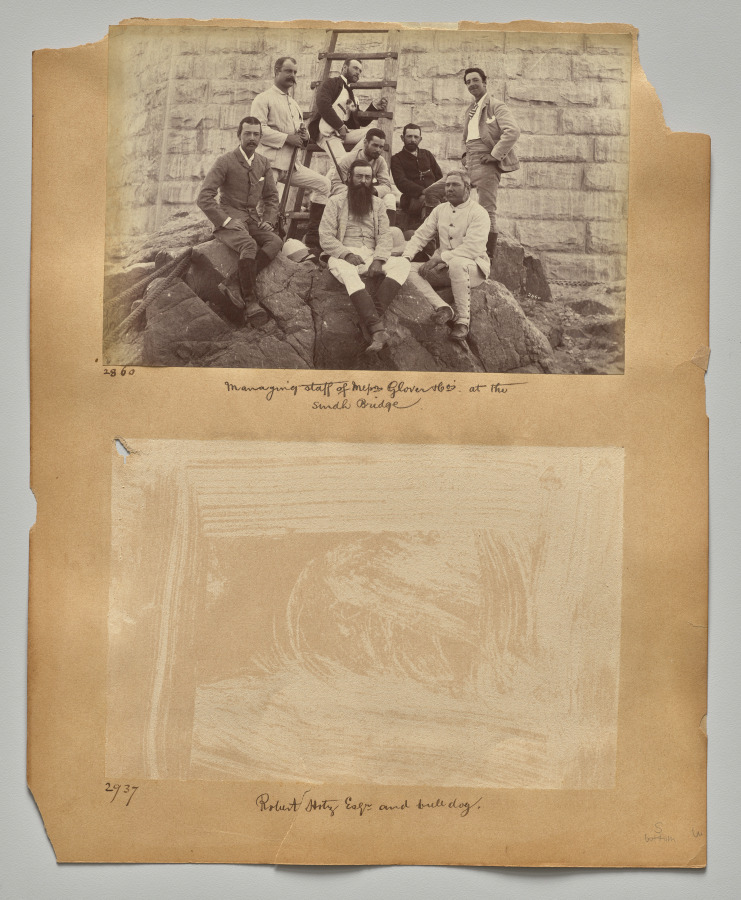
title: Managing staff of Meprs. Glover & Co. at Sindh Bridge (recto, top)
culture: India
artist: Raja Deen Dayal (Indian, 1844–1905)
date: c. 1882–87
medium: albumen print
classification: Photograph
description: These photographs are part of an album, now disassembled, of around 105 photographs taken in India between 1885 and summer 1887 that provide glimpses into the lives of the British colonial elite and royal and upper-class Indians. The museum holds another group of 37 pictures from this album (2016.266), which was probably commissioned by a British civil servant visiting or working in India around 1888 as a personal souvenir of his experiences there.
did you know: Raja Deen Dayal is regarded now, and was considered during his lifetime, to be India’s most important 19th-century photographer.